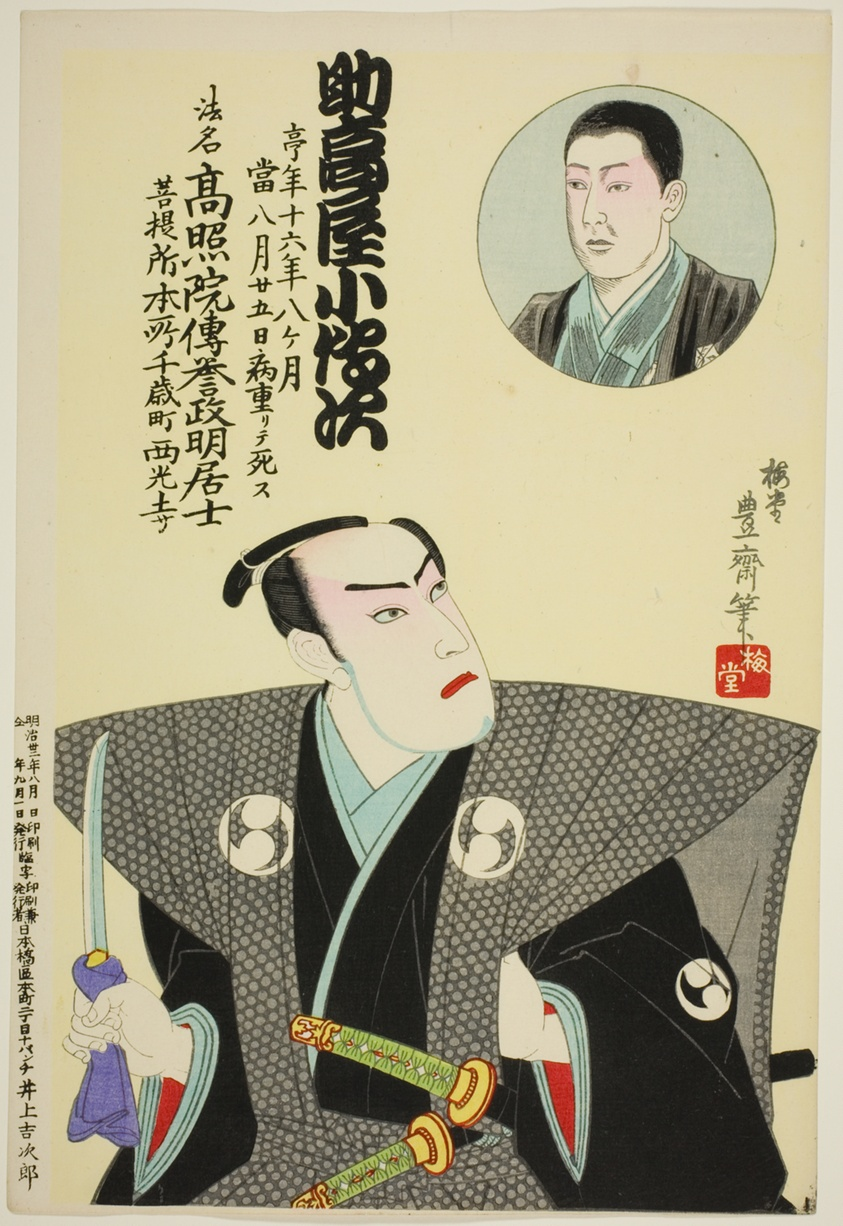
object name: Print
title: Memorial Portrait of the Actor Suketakaya Kodenji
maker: Utagawa Kunisada III (Kunimasa IV, Toyokuni V) (Japanese, 1848–1920)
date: 1899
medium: Color woodblock print; oban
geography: Japan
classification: print; asian art